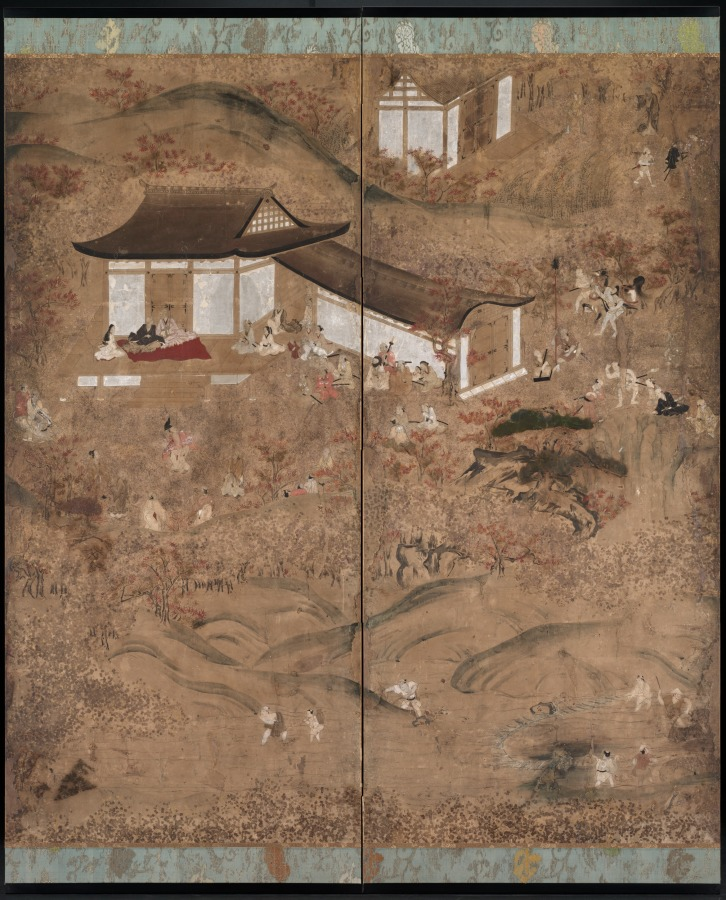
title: Autumn in the Mountains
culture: Japan, Edo period (1615–1868)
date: 1600s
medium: six-fold screen; ink and color with applied silver and gold leaf on paper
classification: Painting